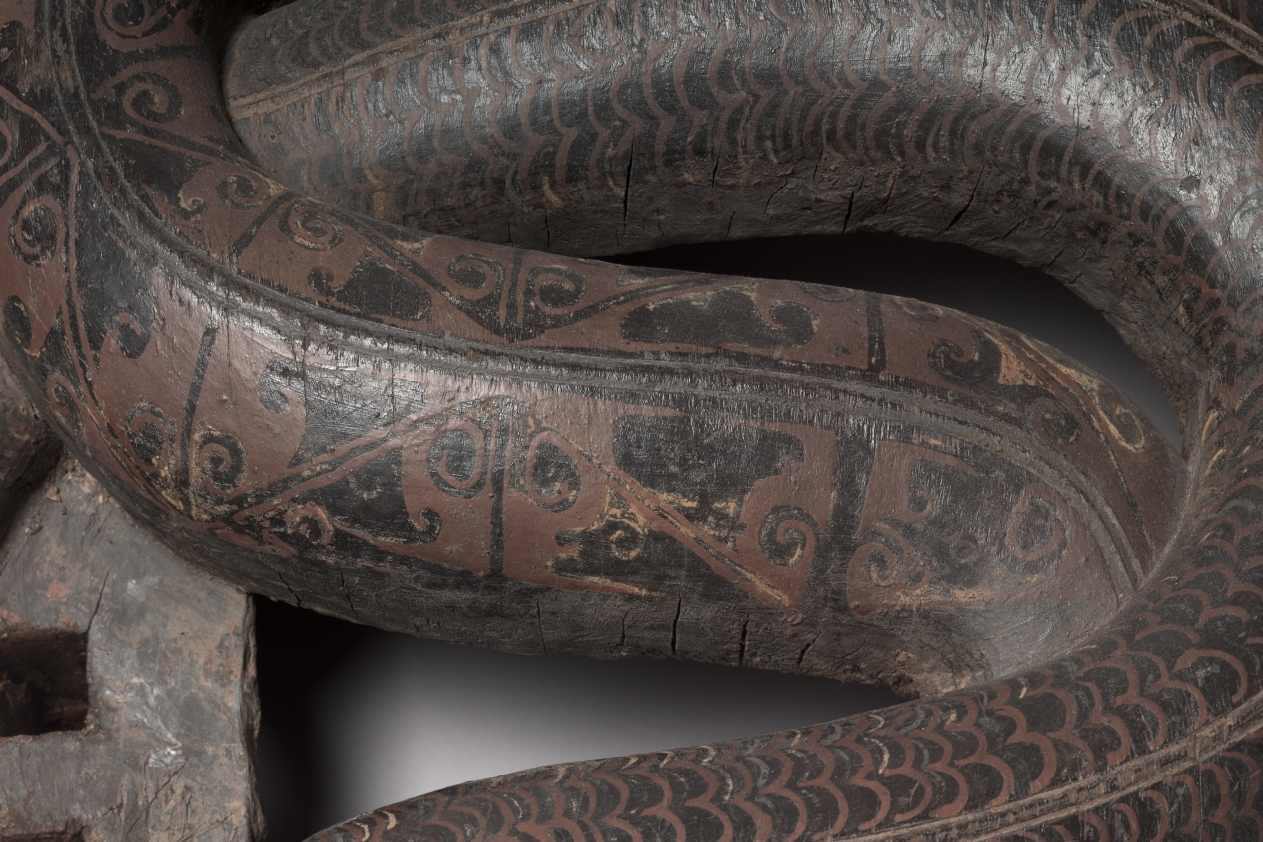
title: Cranes and Serpents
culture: China, reportedly from Hunan province, Changsha, Warring States period (475–221 BCE), State of Chu (c. 1046–223 BCE)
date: 475–221 BCE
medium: lacquered wood with polychromy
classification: Sculpture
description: A different style of ritual art developed in the state of Chu in South China. In addition to bronze vessels, lacquered wood artifacts expanded the repertory of ritual implements. This extraordinary sculpture was probably a drum stand for supporting a suspended drum in ritual ceremonies. It is unique among other excavated drum stands of the Chu, which typically show two birds standing on tigers. The theme of the bird stepping on the serpent was common in the Chu visual culture. Yet the slender proportions and seemingly flimsy structure of this particular set raise the question of whether it was utilitarian or mostly served symbolic functions in the tomb. The birds' and serpents' bodies have designs painted in red lacquer and yellow pigment against the black lacquer. Scientific analyses confirm the additional use of a blue or green pigment that has been discolored over time.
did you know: The cranes' long necks allowed a lightweight drum to be suspended from strings through the beaks, while the densely intertwined snakes provided a weighty base to stabilize the object during musical performances.